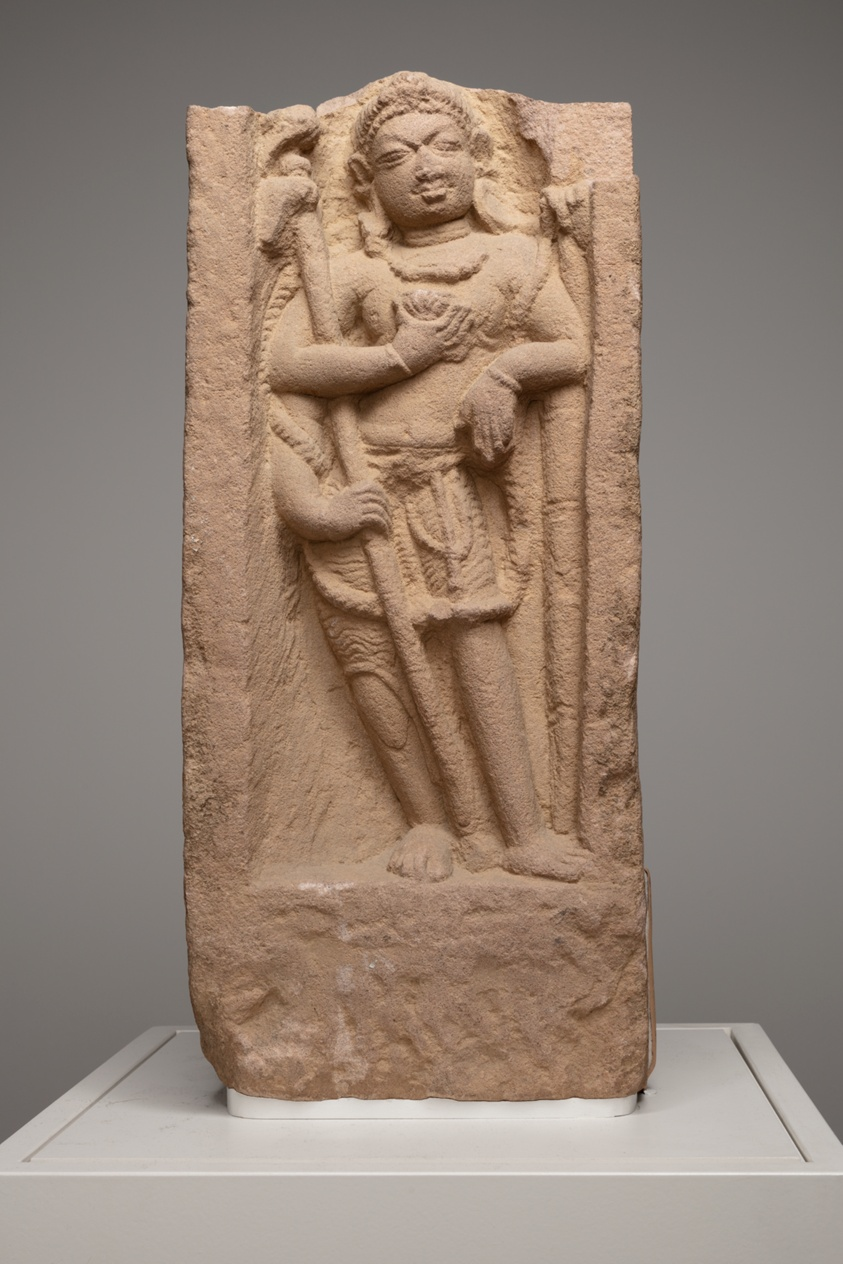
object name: Architectural fragment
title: Pillar Fragment with Gods Shiva and Ganesha and Goddesses Parvati and Durga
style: South Asian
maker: India; Madhya Pradesh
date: 8th/9th century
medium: Sandstone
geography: Madhya Pradesh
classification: stone; architectural fragment; asian art